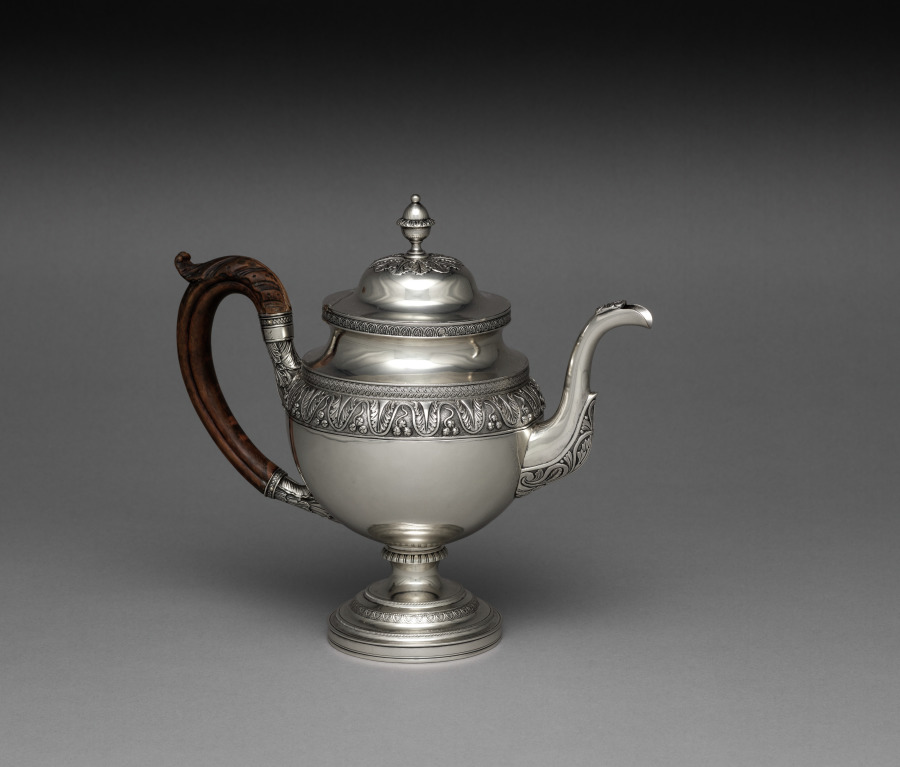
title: Covered Pot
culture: America, Pennsylvania, Philadelphia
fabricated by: Harvey Lewis (American, 1835)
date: c. 1811–25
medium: silver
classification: Silver